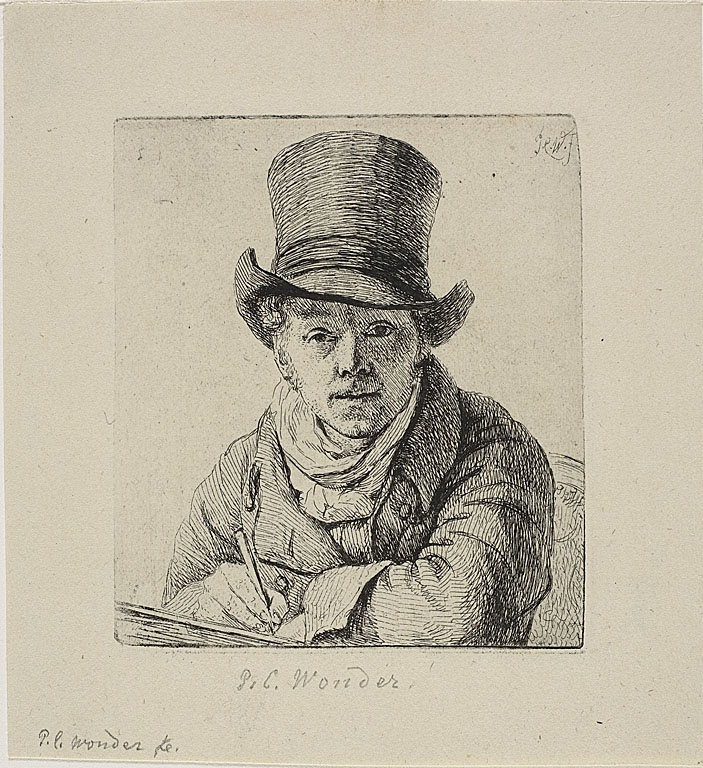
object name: Print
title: Self-Portrait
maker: Pieter Christoffel Wonder (Dutch, 1780-1850)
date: c. 1814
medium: Etching on cream wove paper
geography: Netherlands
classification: etching; prints and drawing; print